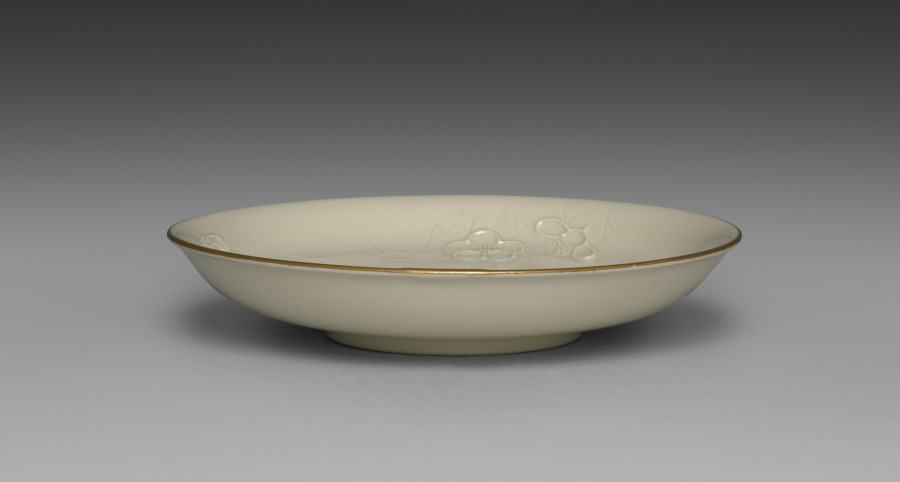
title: Medium-sized Dish from Dining Set with Plum Blossoms and Cracked-Ice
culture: Japan, Meiji period (1868–1912)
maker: Seifū Yohei II (Japanese, 1844–1878)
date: c. 1875–78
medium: Porcelain with molded designs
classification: Ceramic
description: Each item in this set has a delicate low-relief design of flowering plum branches over scattered, intersecting lines meant to resemble the cracked-ice surface of a frozen body of water and is signed on the base in gold pigment. While Yohei II produced many fine works in underglaze blue, like those produced by Kiyomizu Shichibei, he also made works in quite different styles later in his career, from the early 1870 s. In 1873, he was appointed purveyor to the Industrial Center of Kyoto Prefecture, a designation associated with Kyoto’s efforts to reach an international market through the port of Kobe; and from 1875 until his death, he was involved in national-level projects to present Japanese ceramics across the world. It was during this period that Yohei III was apprenticed to Yohei II, and it has been suggested that this set may in fact be an early example of Yohei III’s work, which he signed with his teacher’s name. Decorated with flowers resembling Japanese textile motifs, the set calls to mind the design of Yohei II’s pair of vases with plum blossoms in the Victoria and Albert Museum. Here, the elaborate trees created for a formal public exhibition setting have been translated into the approachable blossoms of the genteel domestic environment. While the designs are consistent across the pieces, each raised flower petal and pistil and each incised line in the ice was done by hand, so the cups, bowls, and dishes are similar yet unique. The bottoms of two boxes once identified the set’s owner, but the information has been deliberately obscured with black ink. However, inscriptions still visible appear to indicate two occasions, once at the end of July 1886 , and once again in June 1916 , when parts of the set were requested from Hokura in Niigata Prefecture. The location corresponds to a neighborhood in the present-day city of Jōetsu. The surname Tsuji 辻 also appears on a paper tag affixed to one of the box cloths. Future research may possibly reveal more about their provenance. A vase by Yohei III in a private collection combines the formal grandeur of the Yohei II vases in the Victoria and Albert Museum with the gentler design of this dining set, placing flowering plum trees against soft, scalloped-edge clouds resembling those in golden screens.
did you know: The dining wares have a creamy white coloration that the four boxes containing them identify as Korean in style.